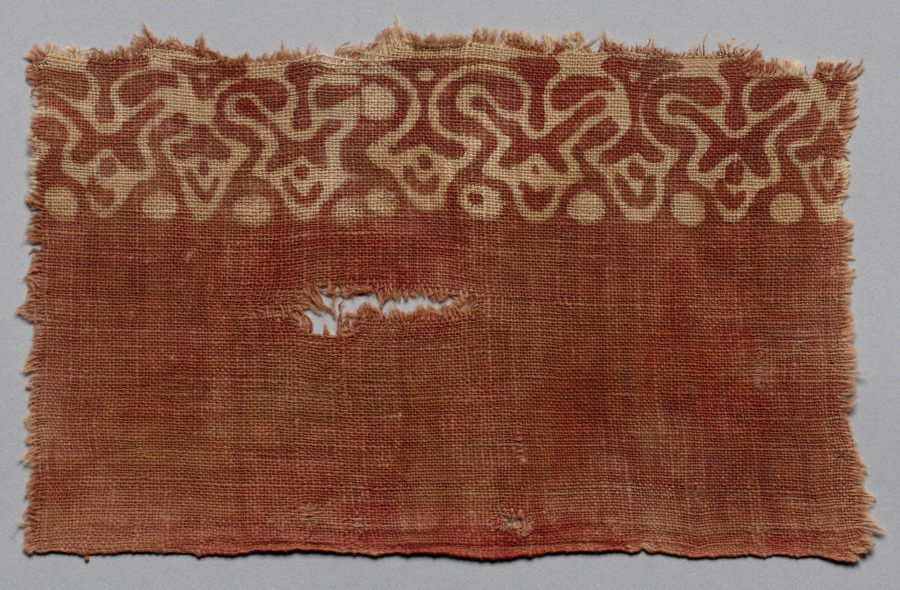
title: Fragment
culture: India, 12th-14th century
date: 1100s - 1300s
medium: plain cloth, resist dyed; cotton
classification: Textile